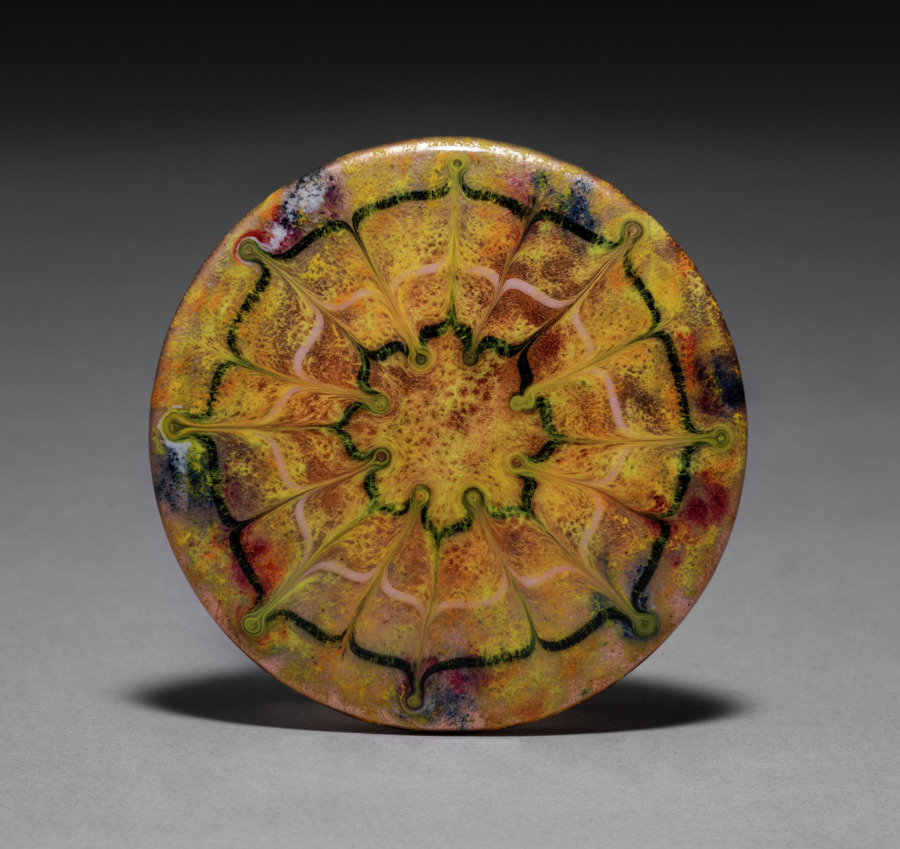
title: Cover for a Box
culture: America, New York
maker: Tiffany Glass & Decorating Company (America, New York, 1892–1902)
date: c. 1898–1902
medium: Favrile glass, enamel on copper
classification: Glass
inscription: Louis C. Tiffany Favrile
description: By 1900 Tiffany had expanded his empire by increasing the firm’s production of “fancy goods,” including inkstands, candlesticks, clocks, small boxes, desk sets, tea screens, and other functional objects. Along with the array of artistic glass designs from his factory in Corona, Queens, works in ceramic, bronze, other metals, and even jewelry abounded. These smaller, more affordable luxury items were designed with as much thought to artistry as the great stained glass windows and lamps through which the firm enjoyed unrivaled success.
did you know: Tiffany's artisans excelled at creating elaborate enameled patterns for luxurious accessories.